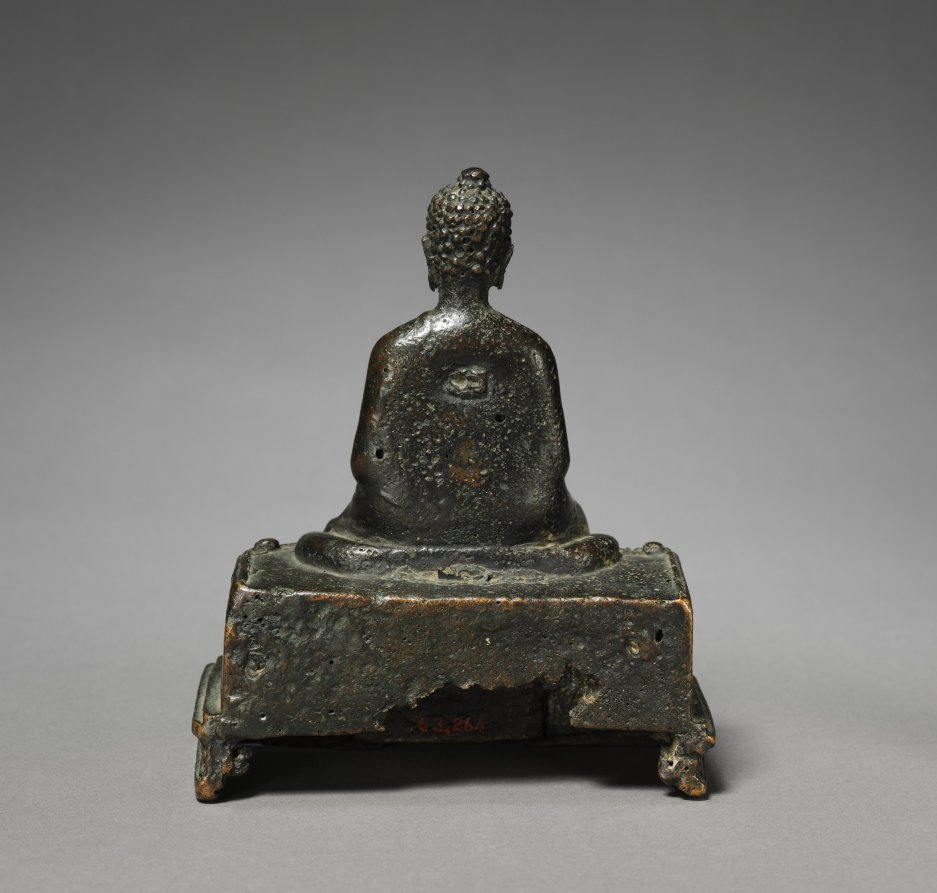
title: Seated Maitreya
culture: Nepal, late Gupta style, late 7th - early 8th century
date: late 600s–early 700s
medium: bronze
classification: Sculpture